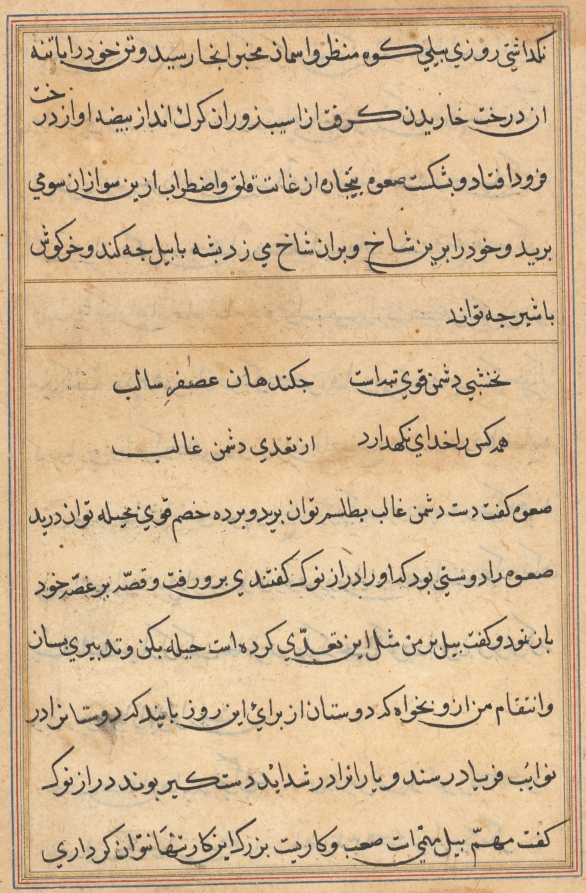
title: Page from Tales of a Parrot (Tuti-nama): text page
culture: Mughal India, court of Akbar (reigned 1556–1605)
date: c. 1560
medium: gum tempera, ink, and gold on paper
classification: Painting